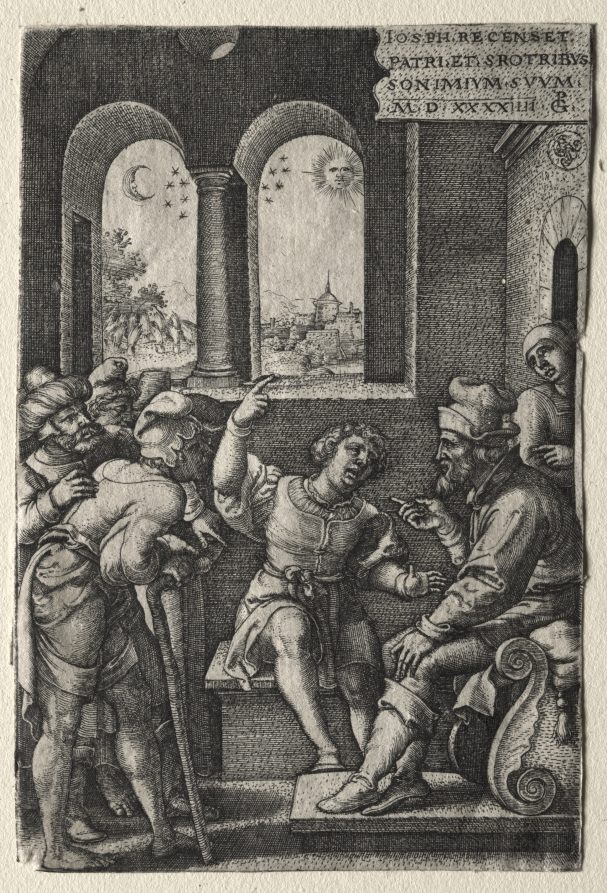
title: The Story of Joseph: Joseph Recounting his Dreams to his Father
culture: Germany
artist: Georg Pencz (German, c. 1500–1550)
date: 1544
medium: engraving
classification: Print